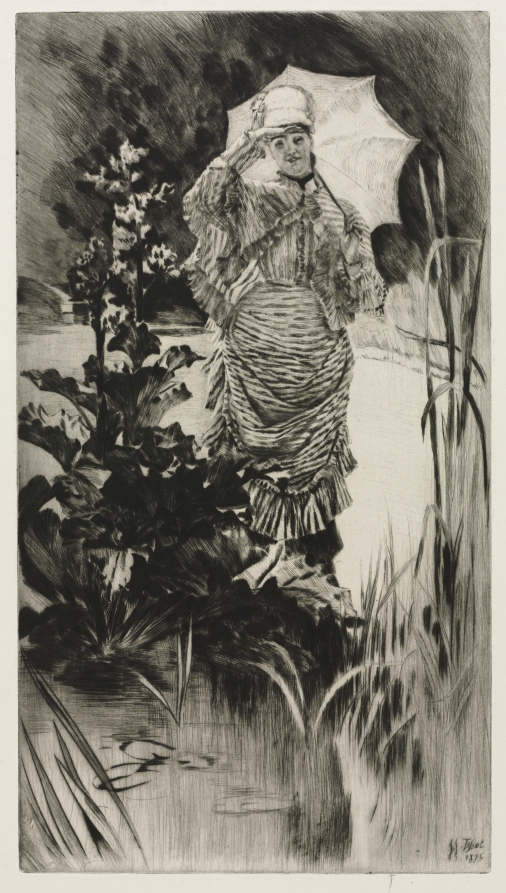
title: Spring Morning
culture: France, 19th century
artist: James Tissot (French, 1836–1902)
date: 1875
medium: drypoint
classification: Print